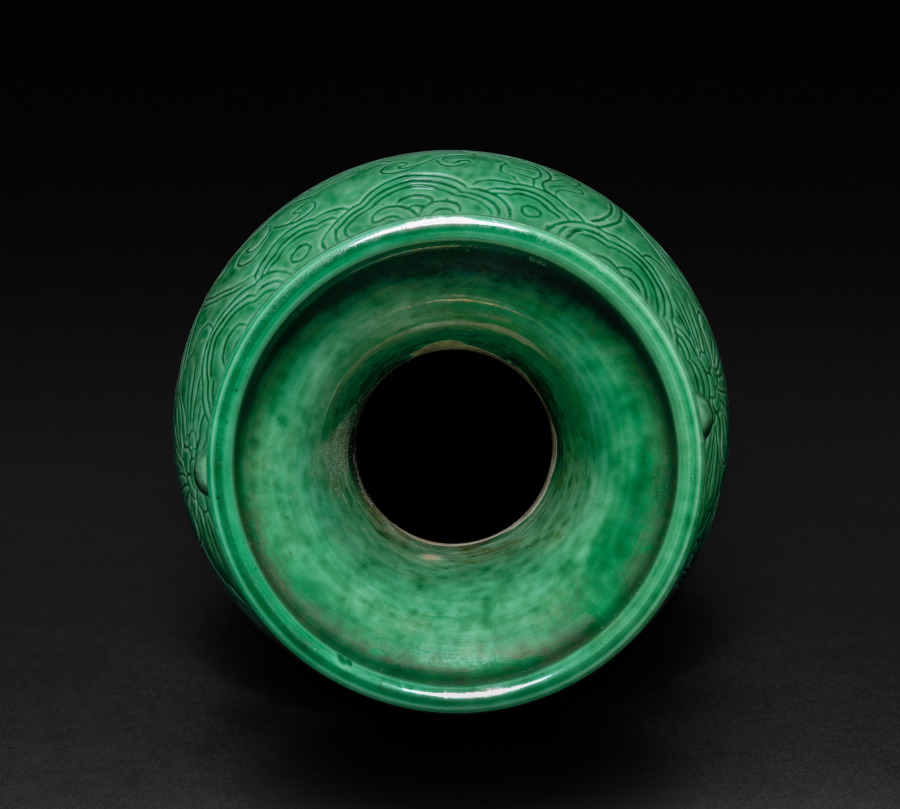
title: Vase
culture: China, Jiangxi province, Jingdezhen kilns, Qing dynasty (1644-1911), Kangxi reign (1662-1722)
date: 1662–1722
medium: glazed white porcelain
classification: Ceramic